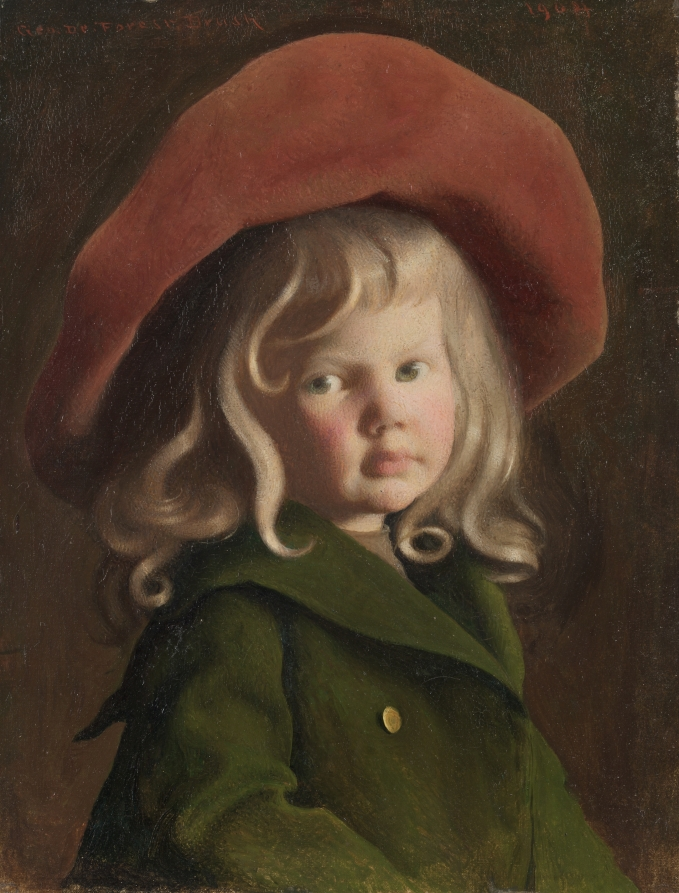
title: The Little Cavalier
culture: America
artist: George De Forest Brush (American, 1855–1941)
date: 1904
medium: oil on canvas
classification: Painting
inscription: signed upper left: GEO. DE. Forest Brush [inscribed upper right: 1904]